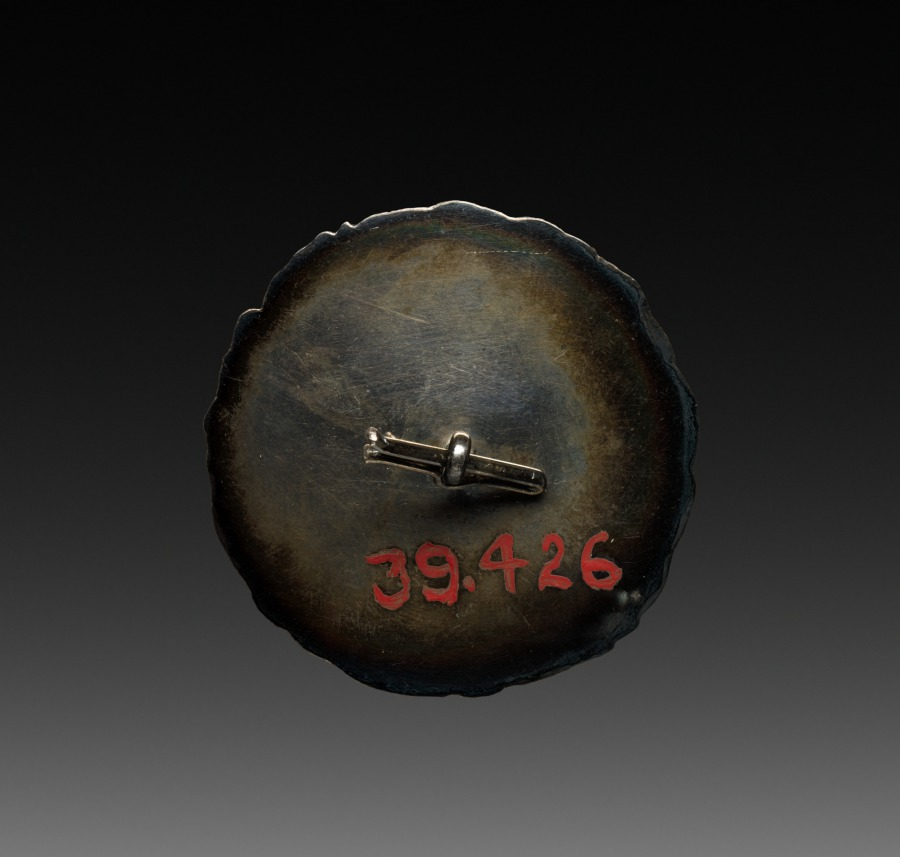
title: Button with Dragon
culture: Japan, Meiji period (1868–1912) to Taishō period (1912–26)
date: early 1900s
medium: One of a set of six buttons; cast (?) silver with relief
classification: Metalwork